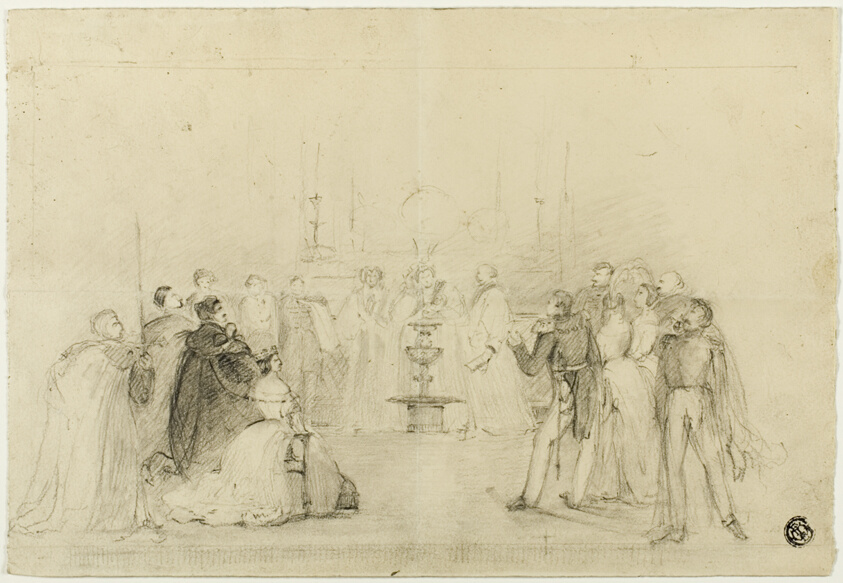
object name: Drawing and Watercolor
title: Study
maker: Possibly John Hayter; English, 1800-after 1891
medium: Black chalk, with stumping, on cream wove paper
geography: England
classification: chalk; drawings (visual works); prints and drawing